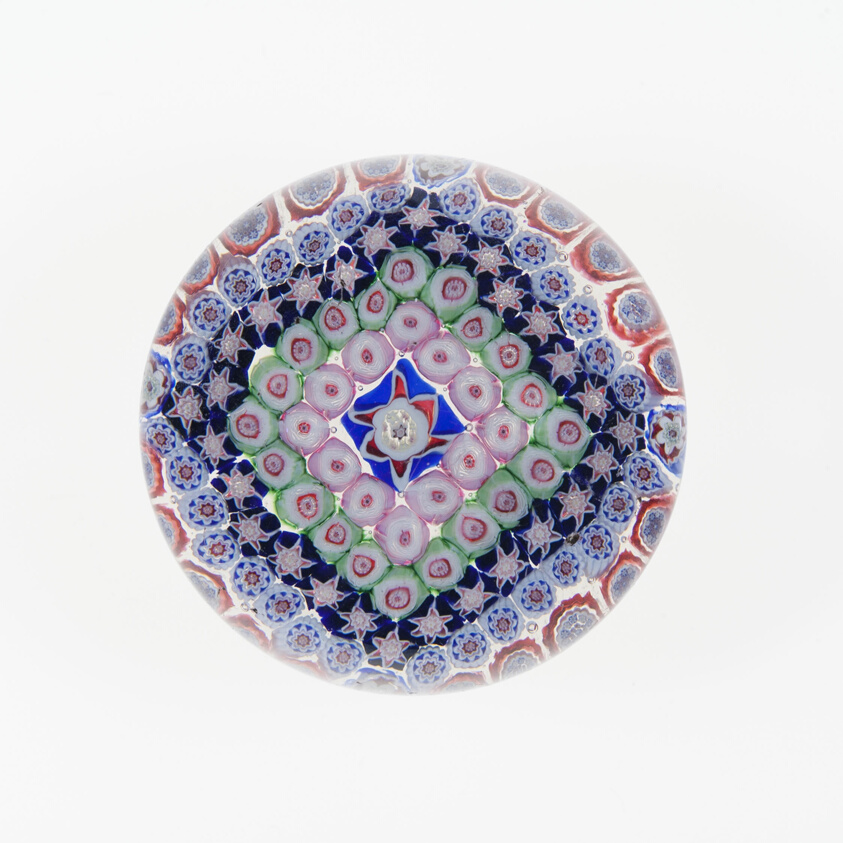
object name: Glass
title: Paperweight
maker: Clichy Glassworks (Cristalleries de Clichy); Clichy, France, 1837-1885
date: c. 1845/60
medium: Glass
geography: Clichy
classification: paperweight; glass